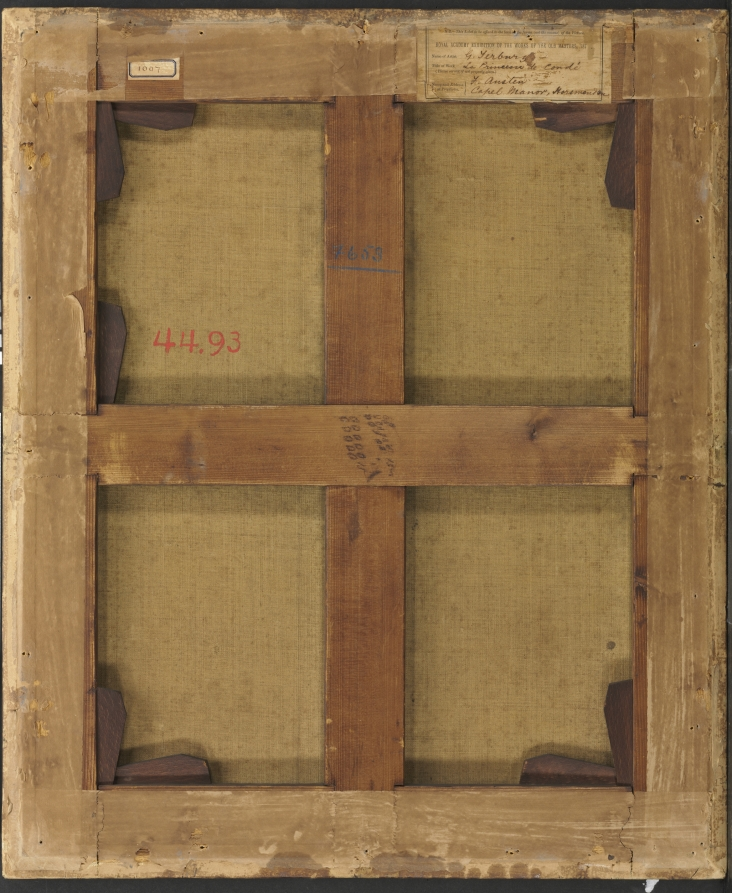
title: Portrait of a Woman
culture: Netherlands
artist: Gerard ter Borch (Dutch, 1617–1681)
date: c. 1665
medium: oil on canvas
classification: Painting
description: Every detail of his subject’s elaborate costume is skillfully recorded: glittering jewels, filmy lace, knots of ribbons, heavy black silk, and shimmering white satin. The ability to recreate satin’s luster was Gerard ter Borch’s particular trademark: he used fine flicks and sweeps of the brush, occasionally adding and wiping away tiny bits of paint to make the white fabric appear to shine. Ter Borch offset the profusion of costume detail by deliberately isolating the figure within a spare setting, allowing us to appreciate the woman’s cool composure. Although her identity is not known, she was undoubtedly a member of the wealthy Dutch elite.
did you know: The pair to this painting (in the National Gallery, London), depicts a man in equally fashionable dress.